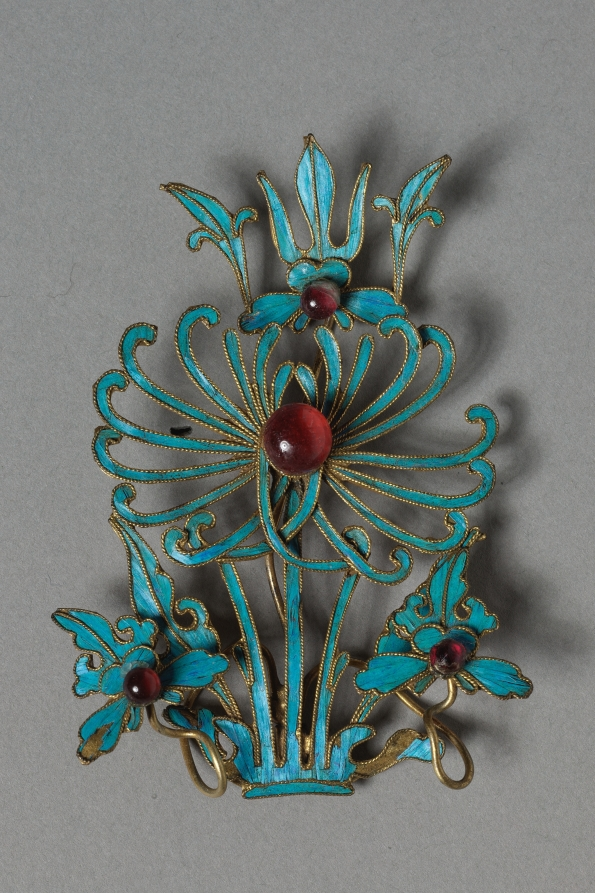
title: Headdress Ornament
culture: China, Qing dynasty (1644-1911)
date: 1800s–1900s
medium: Copper-silver alloy, gilding, kingfisher feathers, glass beads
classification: Jewelry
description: Hair ornaments depicting flowers, butterflies, or birds were worn by ladies of the Manchu elite class.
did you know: The iridescent blue feathers of kingfisher birds are inlaid in hairpins and headdresses.